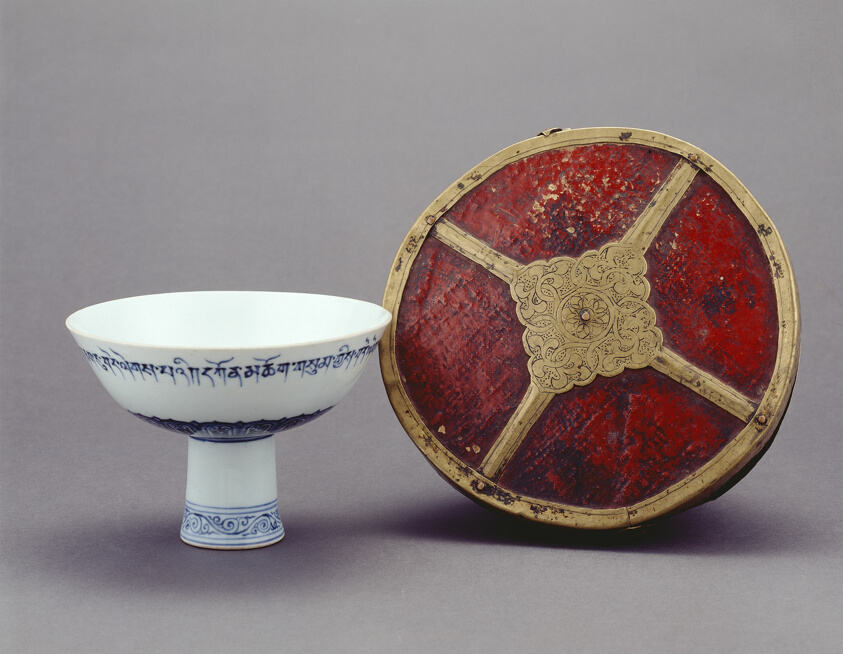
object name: Vessel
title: Stem Bowl with Tibetan Inscription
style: Chinese (culture or style)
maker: China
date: Ming dynasty (1368–1644), Xuande reign mark and period (1426–1435)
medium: Porcelain painted in underglaze blue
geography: China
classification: bowl; porcelain; dish (vessel); ceramics; asian art; vessel